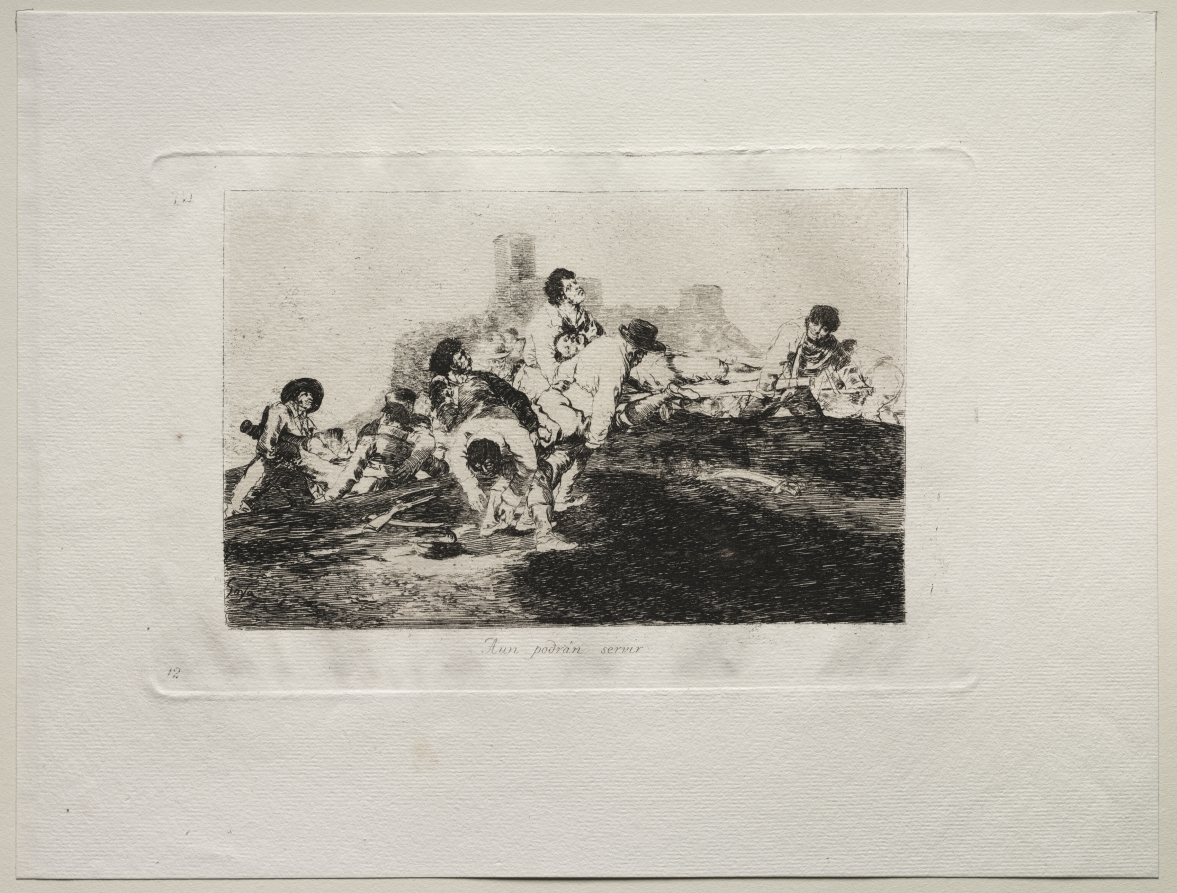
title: The Horrors of War: They Can Still Be of Use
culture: Spain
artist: Francisco de Goya (Spanish, 1746–1828)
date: c. 1810–20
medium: etching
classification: Print